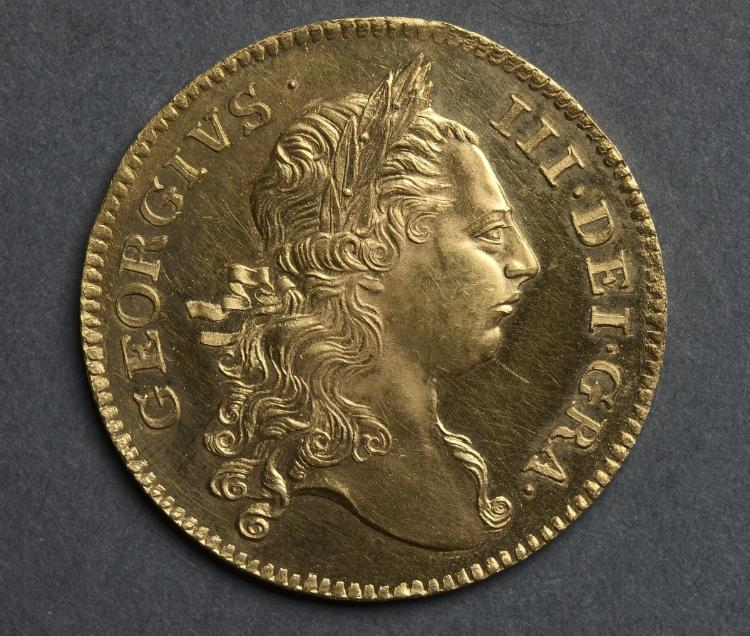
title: Two Guinea Piece: George III (obverse)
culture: England, George III, 1760-1820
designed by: John Sigismund Tanner (British, 1705–1775)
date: 1773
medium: gold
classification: Coins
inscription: DEI . GRA . GEORGIVS . III .